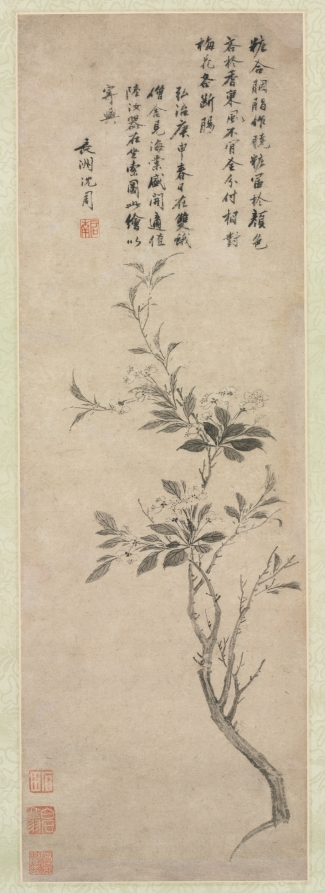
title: Flowering Crab Apple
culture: China, Ming dynasty (1368–1644)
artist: Shen Zhou (Chinese, 1427–1509)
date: 1500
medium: hanging scroll, ink on paper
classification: Painting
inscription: 粧[粉]合胭脂作曉粧，富於顔色吝於香。 東風不肯全分付，相對梅花各斷腸。 弘治庚申春日, 在雙蛾僧舍見海棠盛開, 適值陸汝器在坐索圖, 此繪以寄興。 長洲沈周 [印]啟南; 石田; 白石翁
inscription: 1 additional seal of Wu Yun 吳雲 (1811-1883).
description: Shen Zhou painted a broken branch (zhezhi 折枝) of crab apple, a fragment of nature rather than the full plant in its natural context. Shen uses calligraphic outlines in pure ink to depict the flower petals. The swift yet precise brushstrokes together with the slight S-shaped branch convey vitality. The inscription is a poem written by the artist, commenting on the lovely color and melancholic aura of the crab apple blossom. Shen Zhou is the founder of the Wu School, a group of scholars and officials active around Suzhou in eastern China, known for practicing painting and calligraphy in a refined and elegant style.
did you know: Shen Zhou painted this is an informal and rapidly done presentation picture when he was 74 years old.